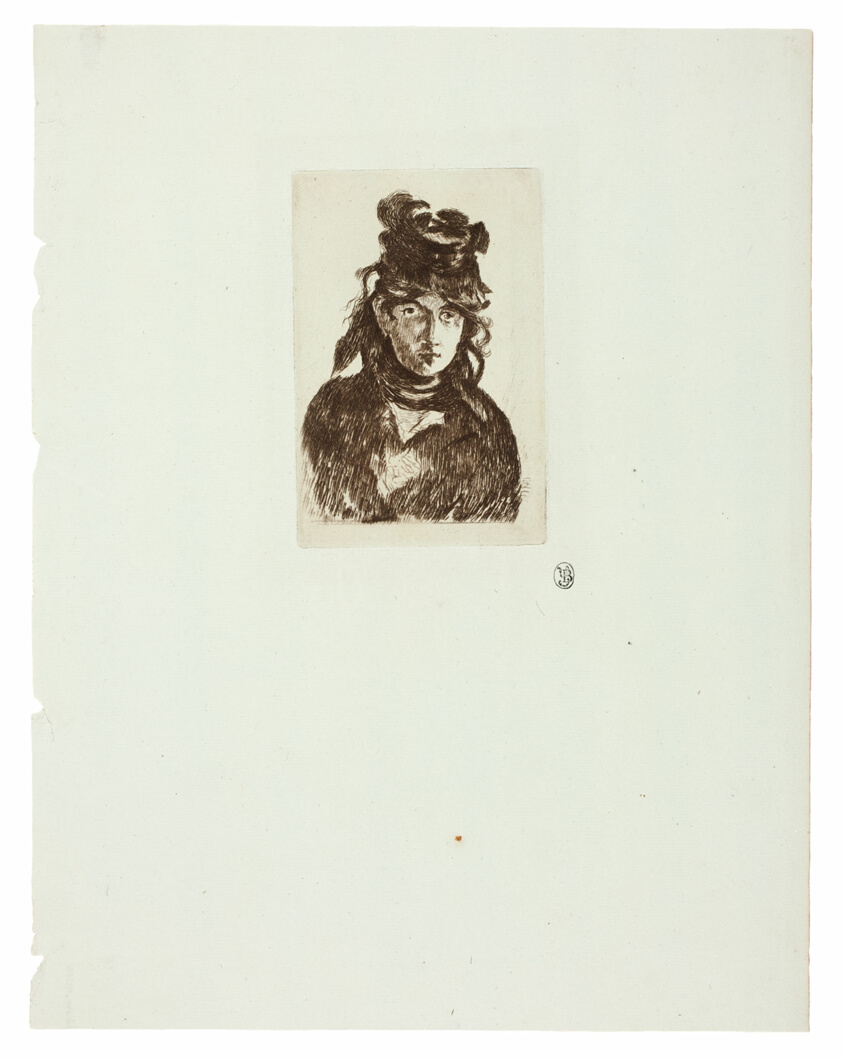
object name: Print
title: Berthe Morisot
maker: Édouard Manet (French, 1832-1883); published by Louis Dumont (French, 19th century)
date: 1872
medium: Etching in brown on blue laid paper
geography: France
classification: etching; print; prints and drawing